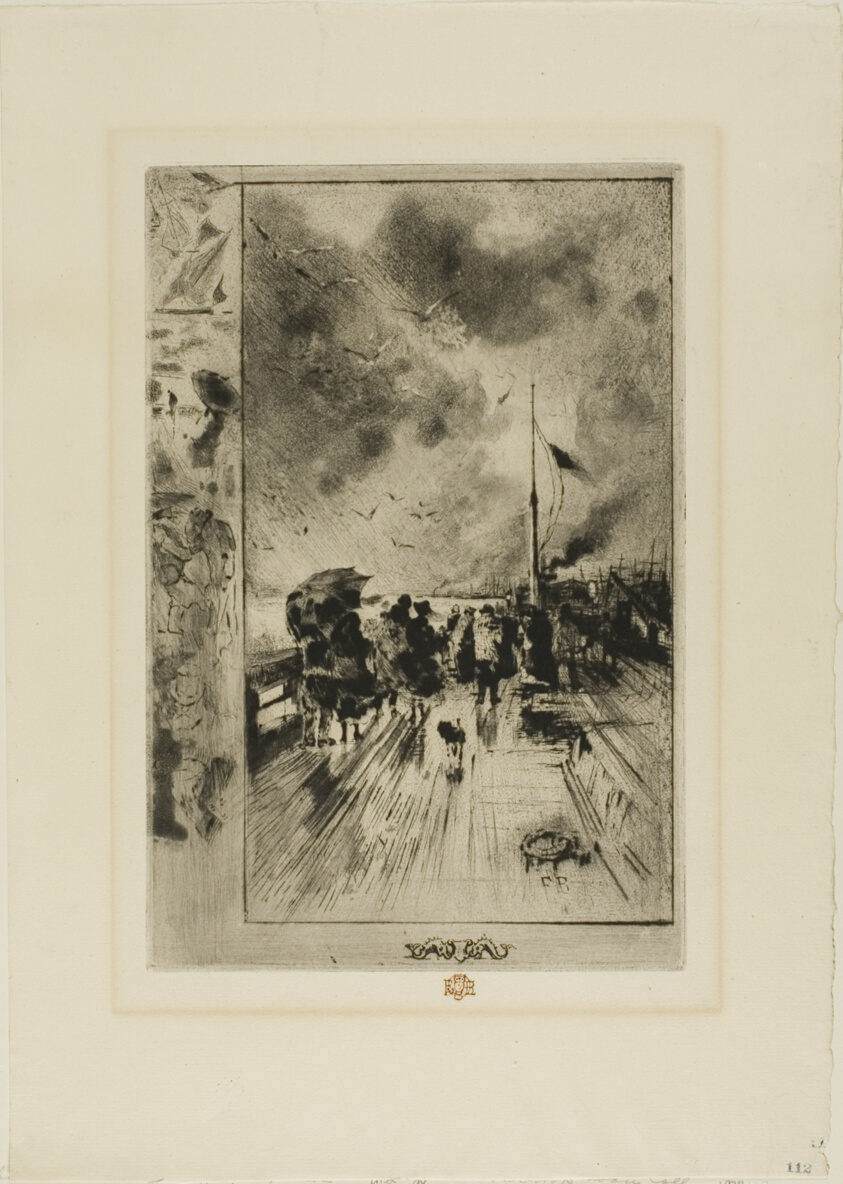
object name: Print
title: A Jetty in England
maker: Félix Hilaire Buhot (French, 1847-1898)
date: 1879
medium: Etching, aquatint, roulette and drypoint on cream laid paper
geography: France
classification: etching; print; prints and drawing